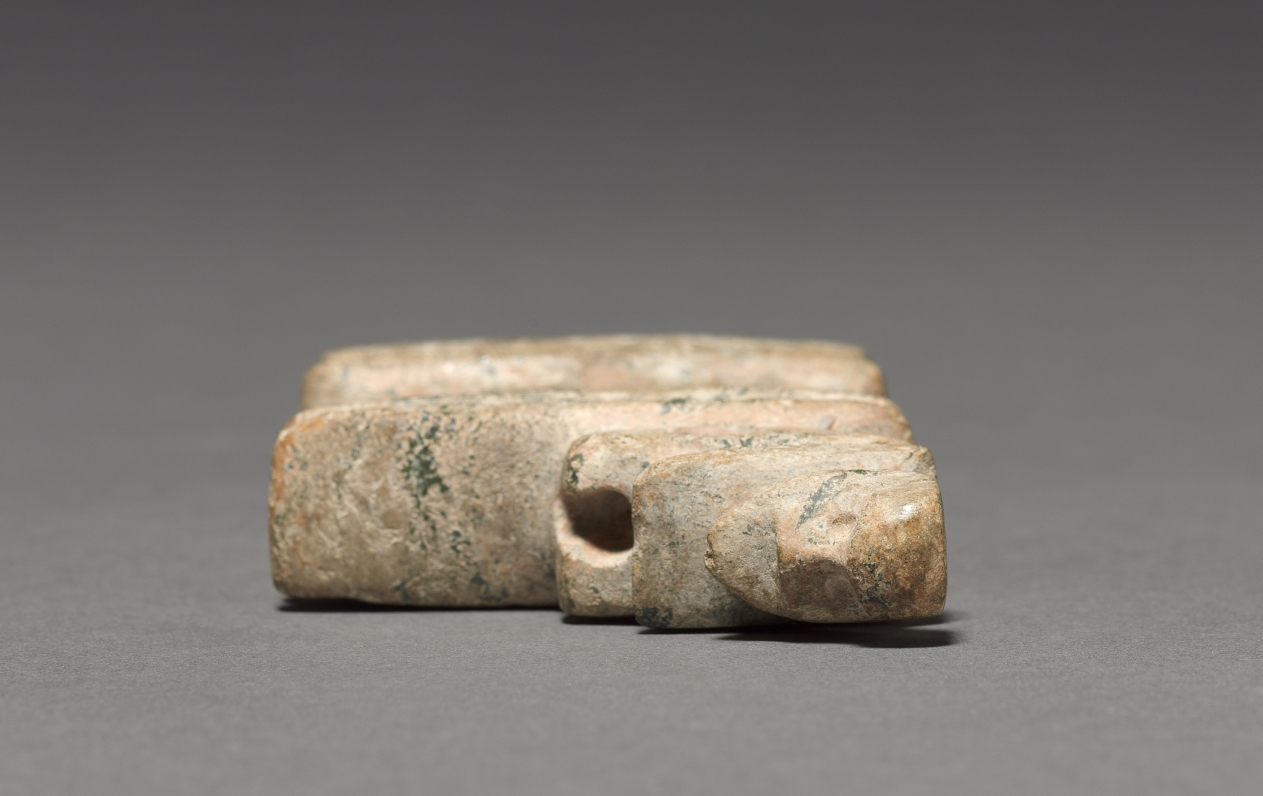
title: Architectural Model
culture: Mesoamerica, Mexico, Guerrero, Mezcala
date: 100 BCE–300 CE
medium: serpentine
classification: Sculpture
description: The Mezcala style takes its name from a river in its homeland, the Guerrero region of western Mexico. The style is known for small-scale stone sculptures including architectural “models” characterized by sleek abstraction. Because comparisons to actual architecture in the Mezcala region are scarce, it is not known whether the models refer to temples, houses, or underground funerary structures.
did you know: The Mezcala style was first recognized and defined in 1956.